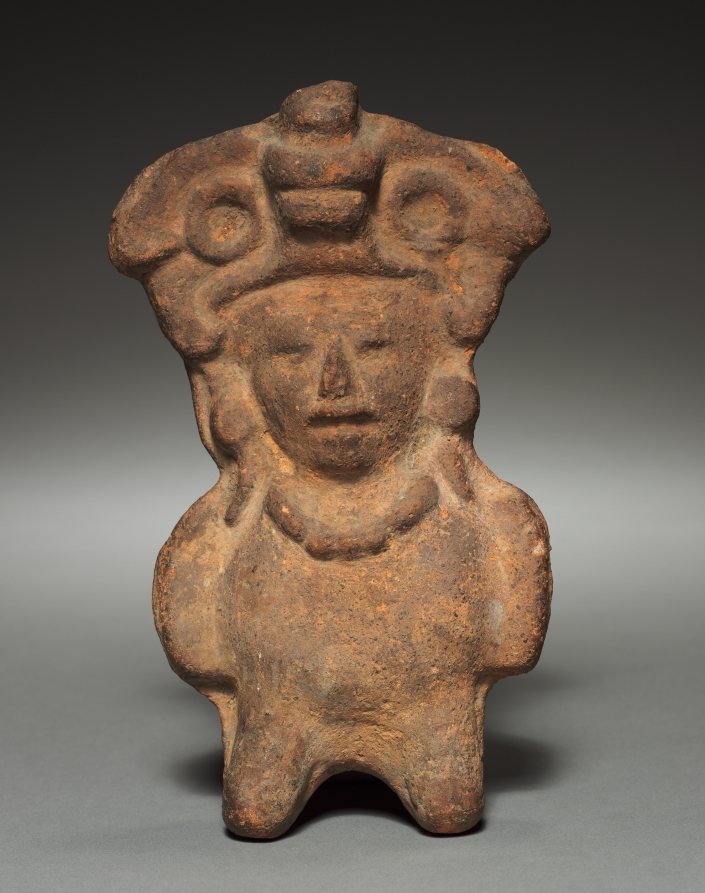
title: Whistle Figure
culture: Mexico, Oaxaca, Zapotec, Monte Albáb IIIB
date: 500–1000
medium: molded pottery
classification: Sculpture